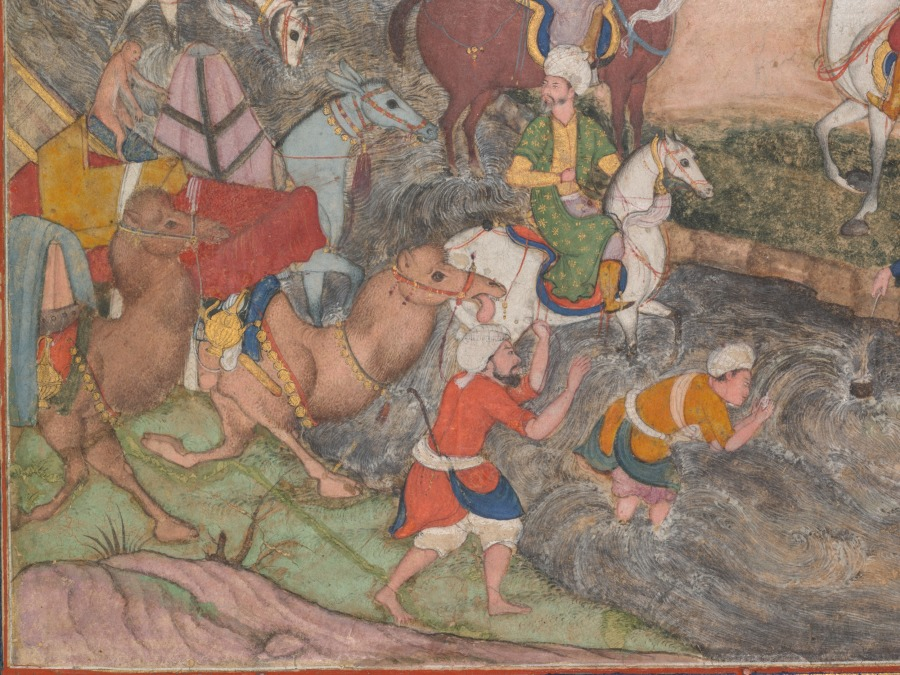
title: Babur meeting with Sultan Ali Mirza at the Kohik River, from a Babur-nama (Memoirs of Babur)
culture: India, Mughal school, 16th century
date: c. 1590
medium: Gum tempera and gold on paper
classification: Painting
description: Thirty years before he captured Delhi and founded the Mughal Empire, Babur began his expansionist activities at the age of 13, as depicted in this painting of an encounter that took place in 1496. Having traveled long distances across harsh dry terrain, Babur confronted one of his rivals who, like him, was angling to march on and conquer the illustrious city of Samarkand, the former capital of his ancestor Timur.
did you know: Camels carry collapsed tents to be pitched for nightly encampments and parties.